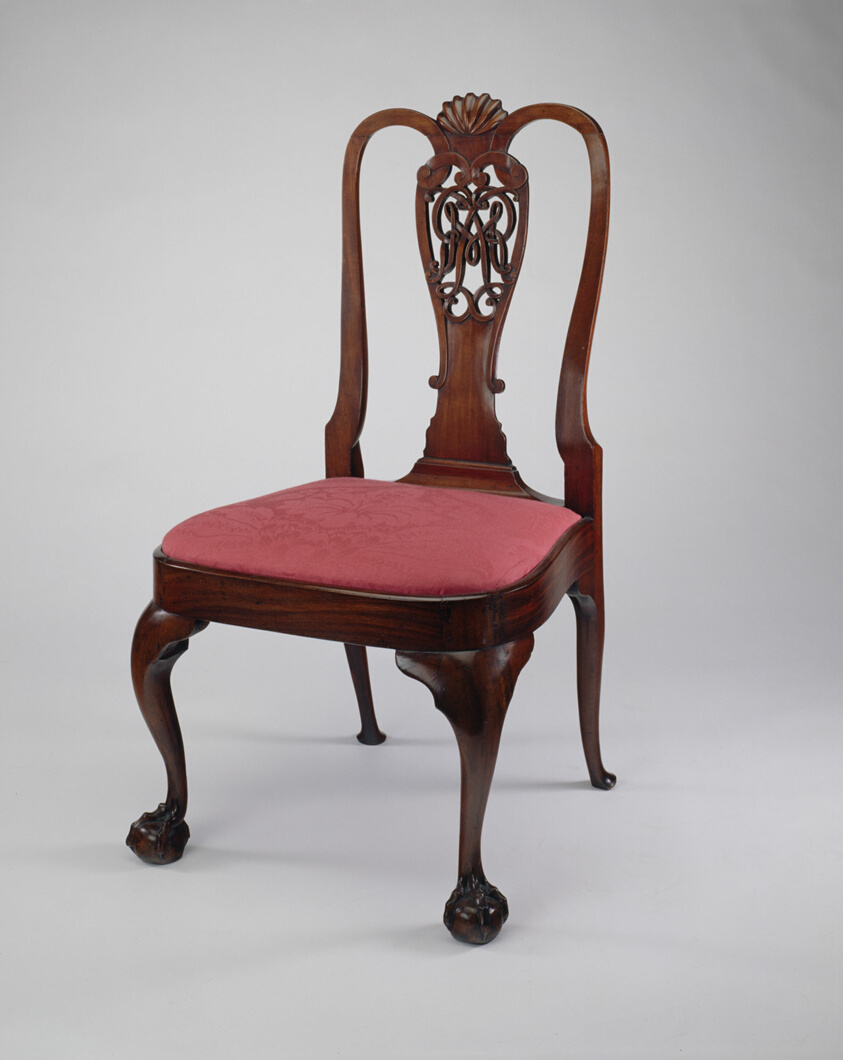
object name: Furniture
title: Side Chair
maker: Artist unknown (American, 18th century); Albany or New York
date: 1742–90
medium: Mahogany, white oak, white pine, and beech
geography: New York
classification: seating; furniture; american decorative arts; american arts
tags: furniture